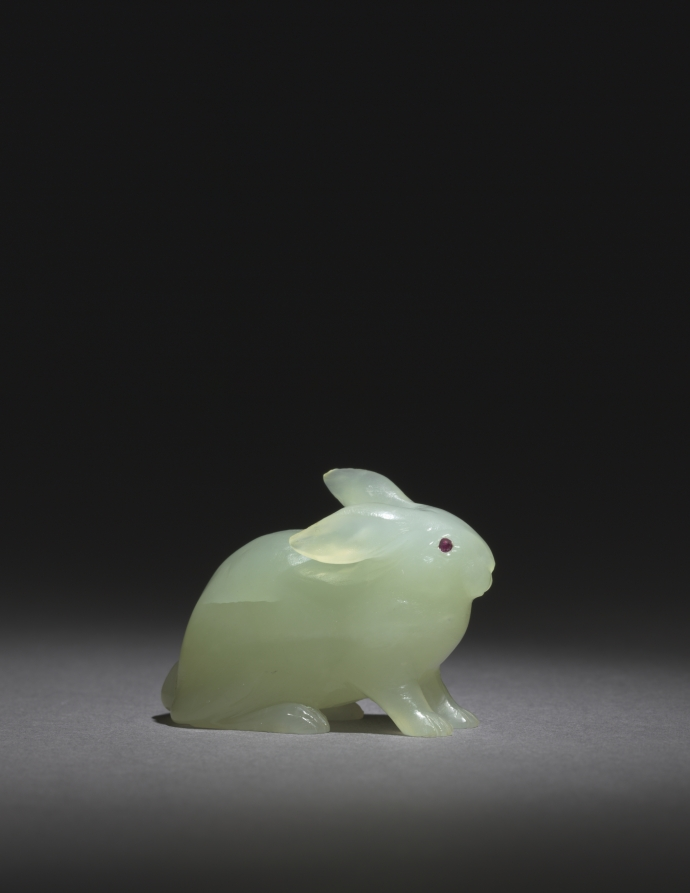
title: Rabbit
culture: Russia, St. Petersburg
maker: House of Fabergé (Russian, 1842–1918)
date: late 1800s-early 1900s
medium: jade, (bowemite?), rubies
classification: Miscellaneous